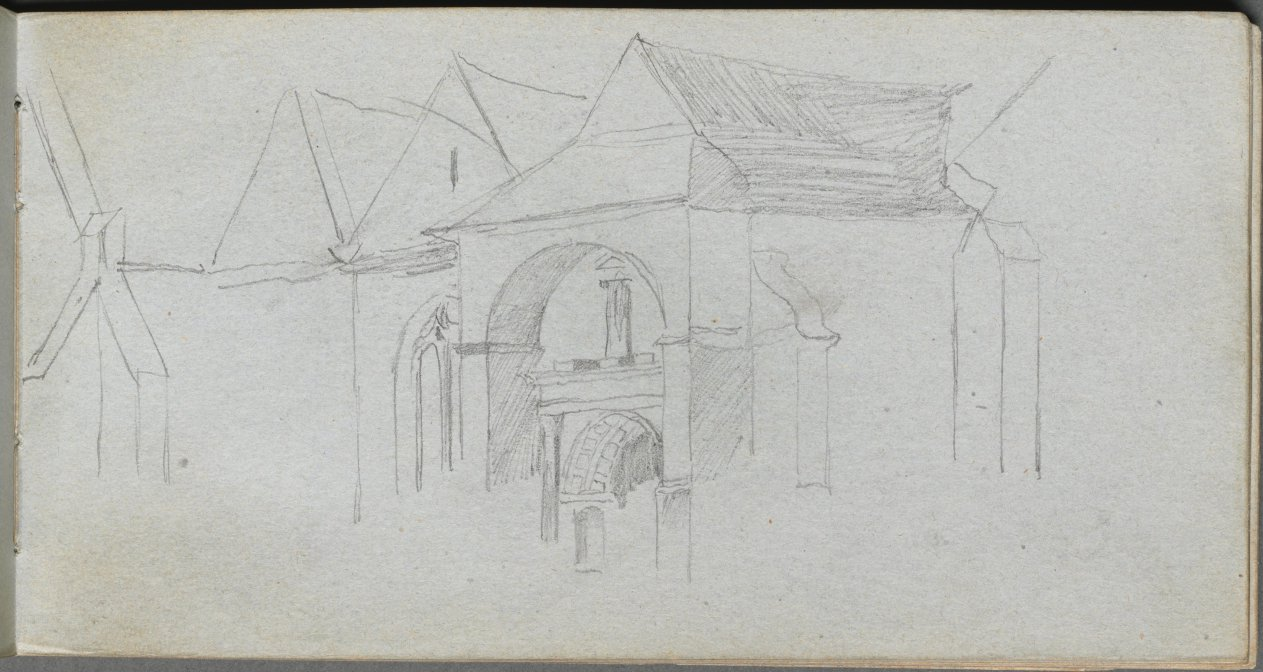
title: Sketchbook, page 22: Architectural Study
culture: France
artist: Ernest Meissonier (French, 1815–1891)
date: c. 1860s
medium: graphite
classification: Bound Volume